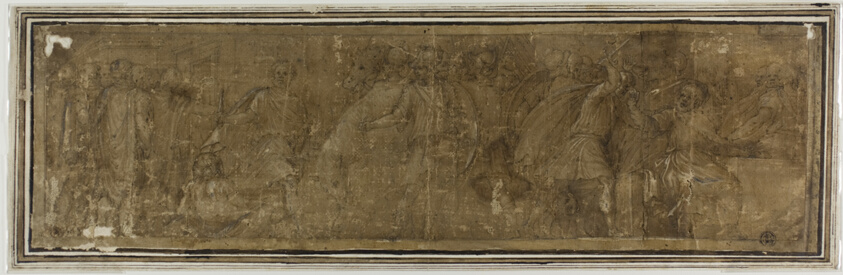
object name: Drawing and Watercolor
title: Mucius Scaevola Crossing the Tiber, Intending to Assassinate Porsenna but Killing his Treasurer by Mistake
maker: After Polidoro Caldara, called Polidoro da Caravaggio; Italian, c. 1499-c. 1543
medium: Pen and brown ink, with brush and brown wash, heightened with lead white (oxidized), on brown laid paper, laid down on fabric and card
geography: Italy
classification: ink with wash; drawings (visual works); prints and drawing